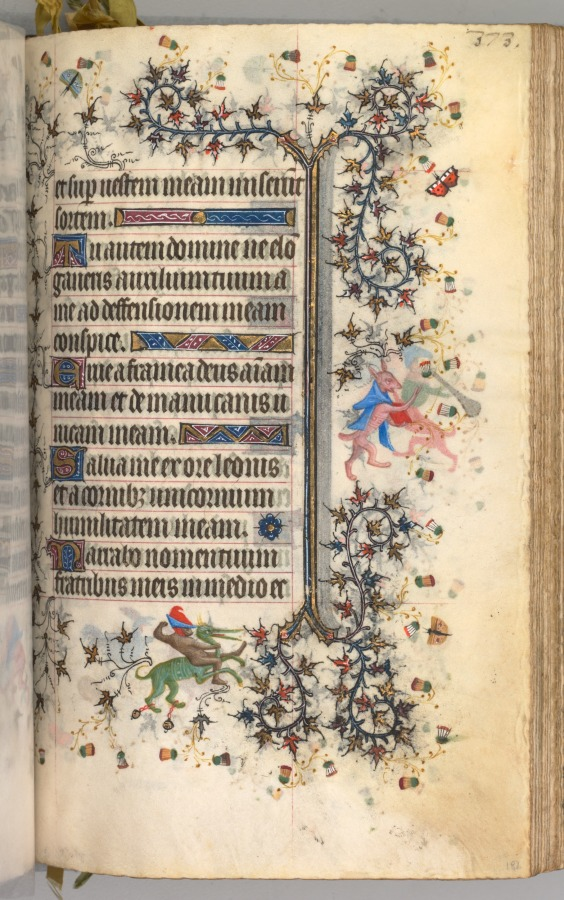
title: Hours of Charles the Noble, King of Navarre (1361-1425): fol. 182r, Text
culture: France, Paris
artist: Master of the Brussels Initials and Associates (French)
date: c. 1405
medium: ink, tempera, and gold on vellum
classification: Bound Volume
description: This precious volume was obviously highly prized by its owner, the French-born King of Navarre, who had his coat of arms painted on no less than twenty folios. Rather than directly commissioning this manuscript from a specific workshop, it seems that Charles the Noble acquired his book of hours -- perhaps ready-made for the luxury market -- while on a trip to Paris in 1404-05. A collaborative effort, six painting styles are evidenced within the pages of this codex, those of two Italians, two Frenchmen, and two Netherlanders. The painter who was responsible for the planning and decoration of the book, and who produced seventeen of the large miniatures, was a Bolognese artist known as the Master of the Brussels Initials. His principal assistant, responsible for most of the borders, was a Florentine who signed his name "Zecho" da Firenze on folio 208 verso.